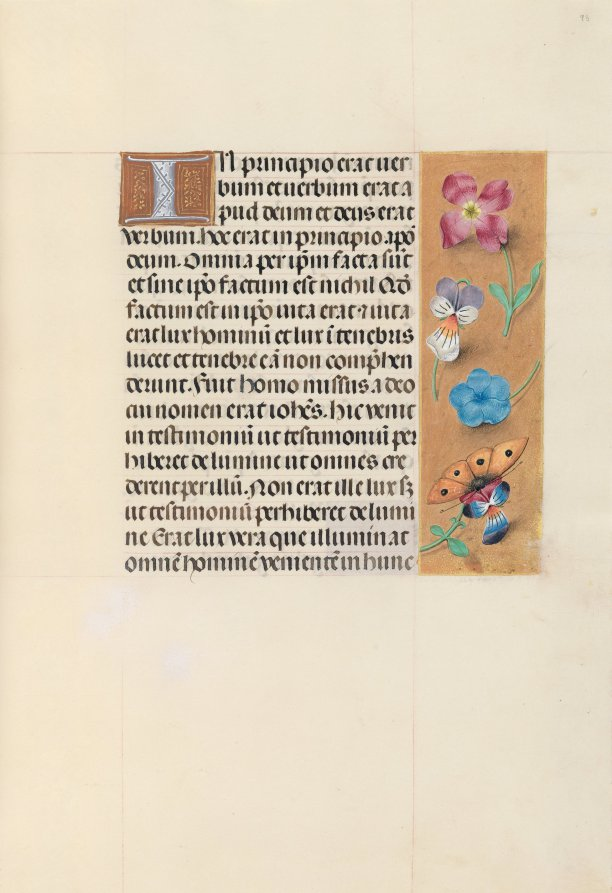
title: Hours of Queen Isabella the Catholic, Queen of Spain: Fol. 93r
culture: Flanders, Ghent and Bruges, late 15th century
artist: Master of the First Prayerbook of Maximillian (Flemish, c. 1444–1519)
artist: and Associates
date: c. 1500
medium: ink, tempera, and gold on vellum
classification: Bound Volume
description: This manuscript was illuminated by a circle of at least five highly organized manuscript painters active in the Flemish cities of Ghent and Bruges. The principal illuminator was Alexander Bening, who painted the majority of the book's miniatures. Manuscripts produced by this circle of artists are renowned for the decoration of their borders, which typically feature a rich variety of realistically-painted flowers, birds, and butterflies. This prayer book, called a book of hours, was intended not for a cleric, but for the private devotions of a lay person-in this case, Isabella the Catholic, Queen of Spain (1451-1504). Isabella's coat of arms embellishes the book's frontispiece. It is unlikely that the book was commissioned by the Queen herself; rather, she probably received it as a diplomatic gift from someone courting her patronage, perhaps Cardinal Francisco Jimenez de Cisneros. A Franciscan friar, Jimenez was dependent upon Isabella for his advancement, first to the post of Queen's confessor in 1492, and then to Archbishop of Toledo in 1495.